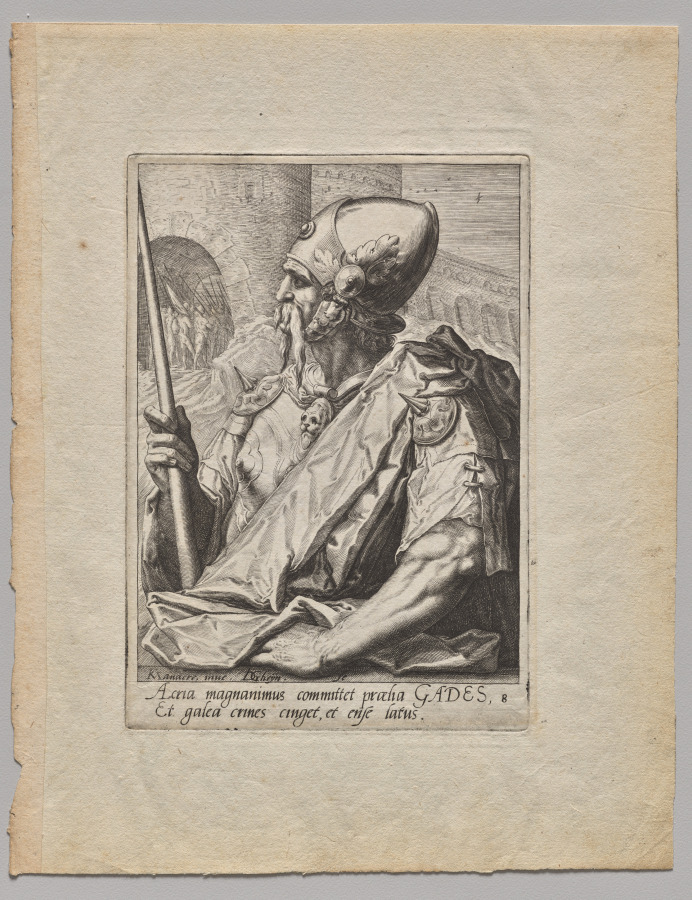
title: Plate 8: Gad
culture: Netherlands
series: The Twelve Sons of Jacob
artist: Jacob de Gheyn II (Netherlandish, 1565–1629)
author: after Karel I van Mander (Netherlandish, 1548–1606)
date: c. 1589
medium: engraving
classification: Print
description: In this print, the biblical figure Gad holds a spear and wears a suit of armor while a militia gathers behind him, denoting his preparedness for battle. This is one of a series of prints depicting the twelve sons of Jacob, each with an attribute and costume that denotes his character. According to the Old Testament, Jacob blessed each of his twelve sons, prophesizing the destiny of their tribe, and assigning them a parcel of land in Canaan. The print series was made in the Netherlands in the late 16th century, a time of political struggle when Old Testament heroes were popular exemplars of fortitude and patience.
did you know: The upright, profile view of this Old Testament figure dressed in armor helps to characterize his military pursuits as noble in nature.